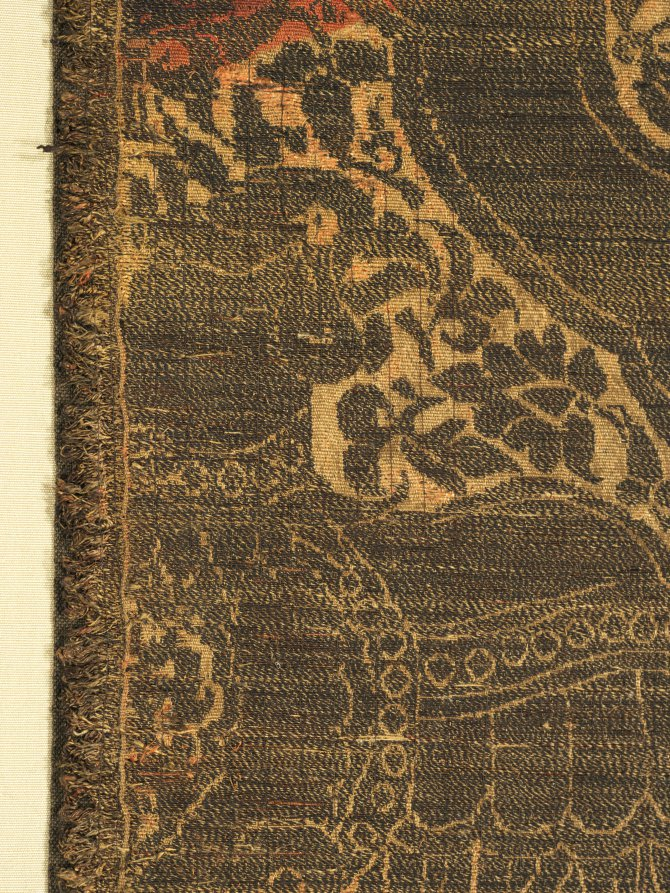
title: Cloth of gold with felines and eagles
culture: Northeast Iran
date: 1225–75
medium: Silk and gold thread: lampas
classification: Textile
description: Mongol taste for luxury was equated with gold, symbol of imperial authority, power, and legitimacy. This splendid cloth of gold-exceptionally large and luxurious-may have enriched the interior of a palace or a majestic tent. The golden pattern, although tarnished on the faded red silk ground, features scalloped medallions with felines whose long tails terminate in dragons’ heads amid elegant floral vines. Double-headed eagles form interstitial motifs on the floral ground. A radiant gold-on-gold band of pseudo-Arabic script enriches the top, woven with gold strips wrapped around a silk core on a ground of flat strips of gold, immediately beneath the pattern testing area.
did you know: Mongol cloths of gold, called nasji, incorporate Iranian, Central Asian, and Chinese features, reflecting the effects of gift exchanges and international commerce.